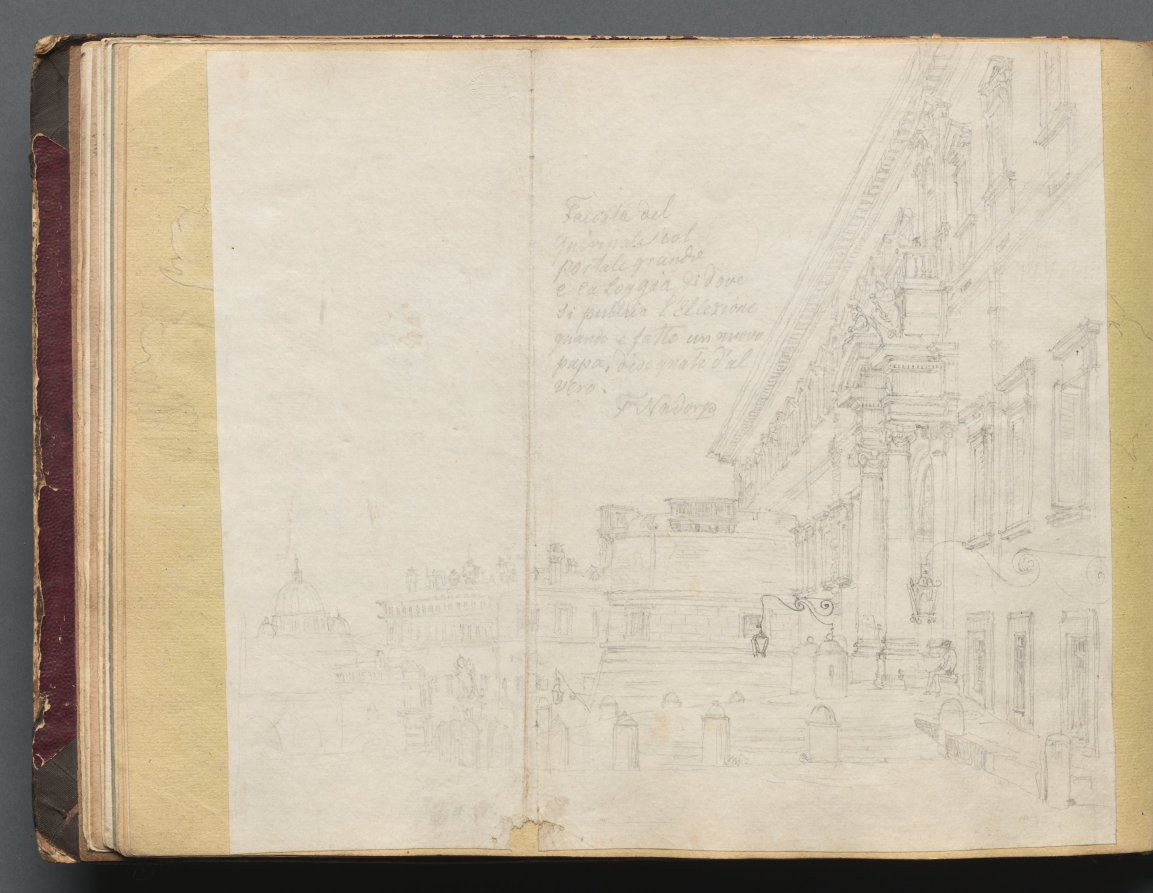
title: Album with Views of Rome and Surroundings, Landscape Studies, page 15b: Roman Architectural View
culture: Germany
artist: Franz Johann Heinrich Nadorp (German, 1794–1876)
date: c. 1830s-70s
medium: graphite on white paper laid down on yellow paper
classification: Bound Volume